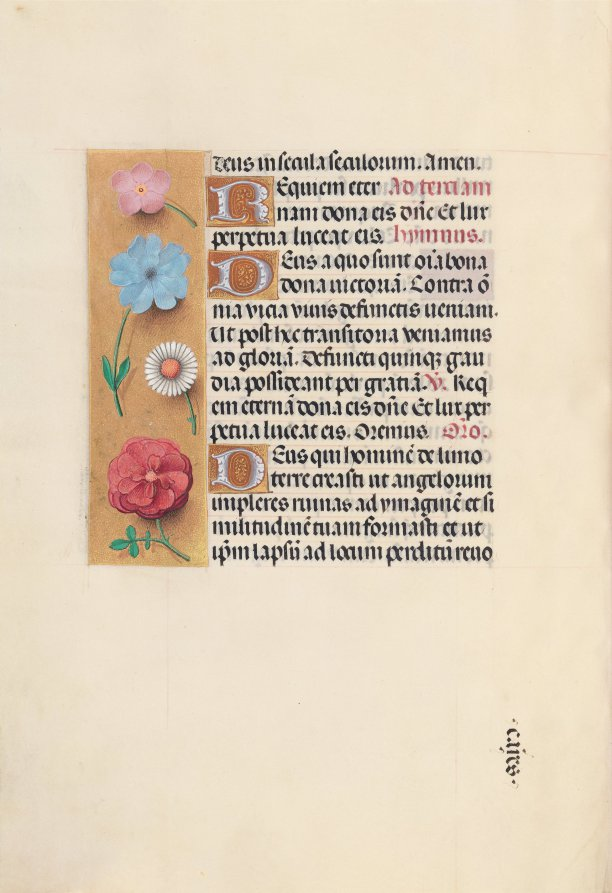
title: Hours of Queen Isabella the Catholic, Queen of Spain: Fol. 26v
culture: Flanders, Ghent and Bruges, late 15th century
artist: Master of the First Prayerbook of Maximillian (Flemish, c. 1444–1519)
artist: and Associates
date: c. 1500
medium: ink, tempera, and gold on vellum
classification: Bound Volume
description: A great lover of Flemish art, Queen Isabella treasured her many devotional books. This deluxe manuscript was created for her private devotions by highly organized and distinctly talented manuscript painters active in Ghent and Bruges. The Ghent-Bruges school represents the culmination of Flemish book painting, whose main features were the use of rich colors, illusionistic effects, a love of landscape, and a strong sense of visual narrative. Manuscripts produced by this circle of artists are renowned for their border decoration featuring a rich variety of realistically painted flowers, scrolling acanthus leaves, birds, and butterflies.